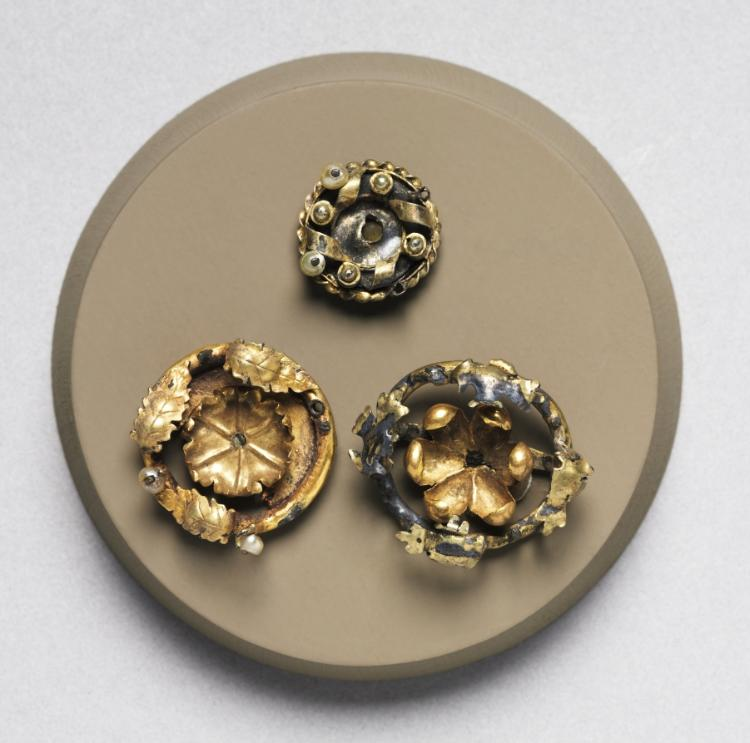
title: Brooch (Element of Garment Clasp)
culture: France, Paris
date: c. 1400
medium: gold, gilt silver and pearls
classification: Jewelry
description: During the fourteenth century, brooches such as this group of five were ordinarily worn at the neck to clasp a lady's cloak or dress. They could also be sewn into a garment or hat as applied ornament.